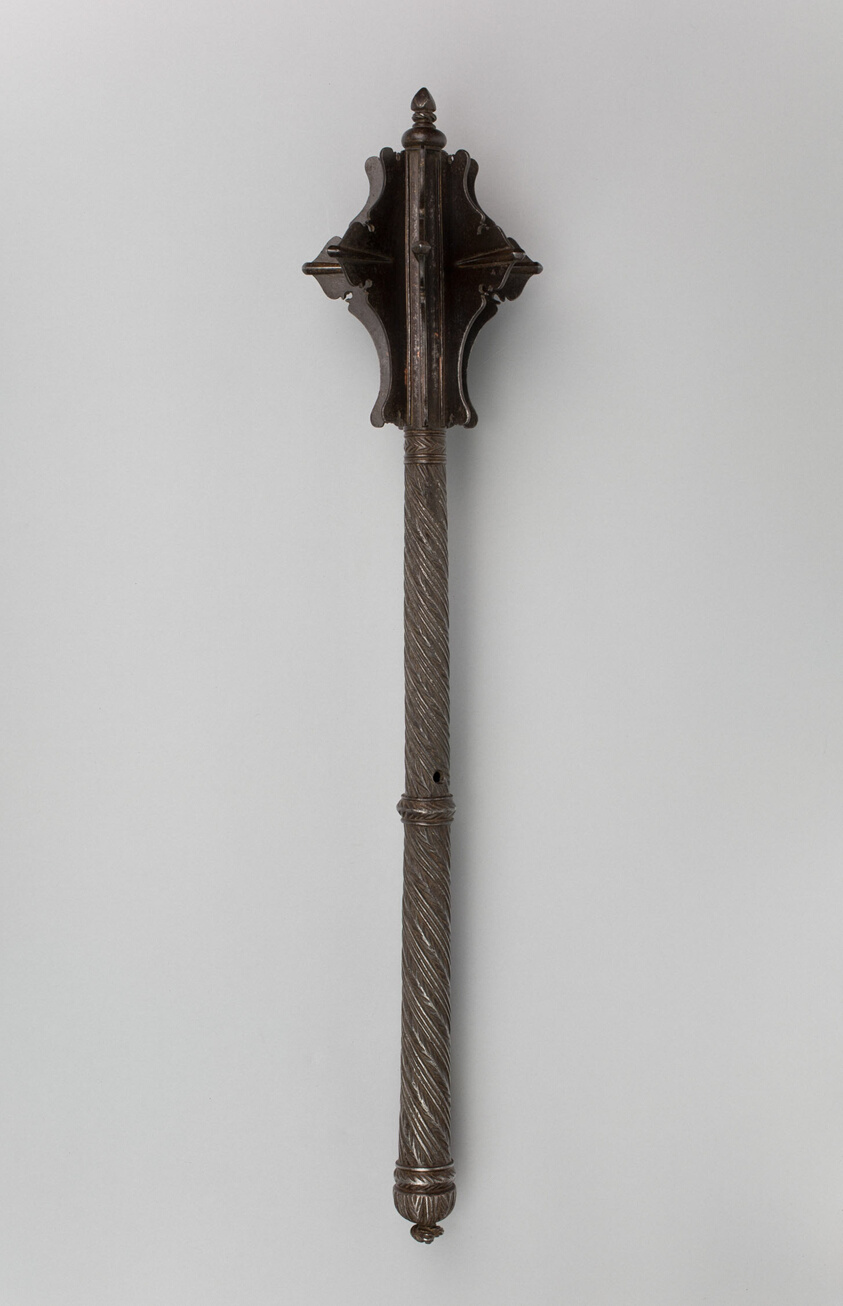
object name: Arms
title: Mace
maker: German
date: 1550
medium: Steel and iron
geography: Germany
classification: shafted weapon; arms; arms and armor